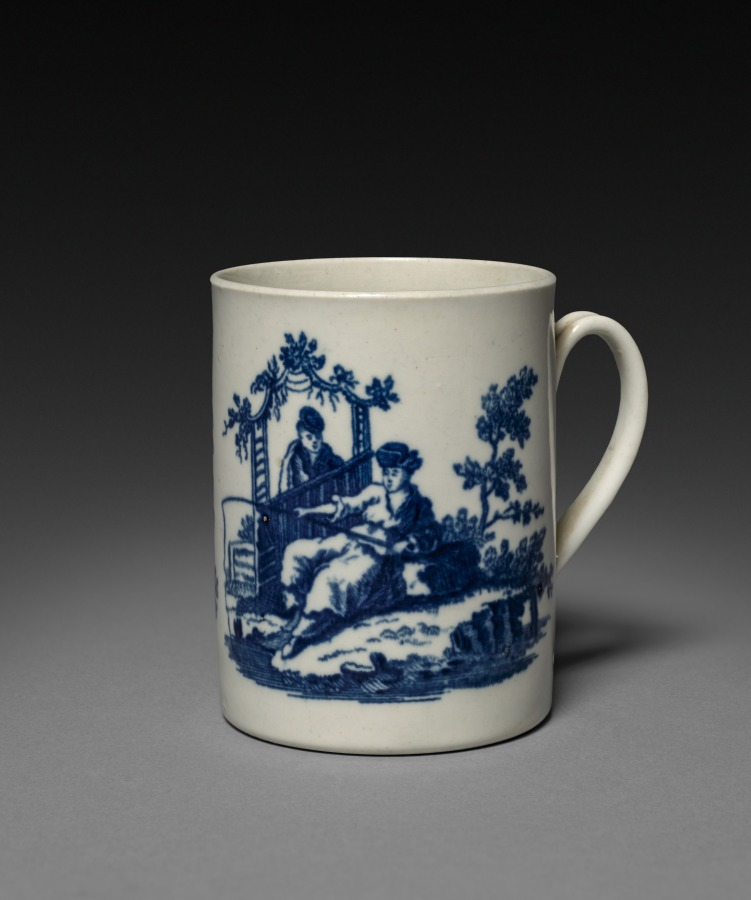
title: Chinoiserie Mug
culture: England, Worcester, 18th century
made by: Worcester Porcelain Factory (British, established 1751)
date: c. 1760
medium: soft-paste porcelain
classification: Ceramic